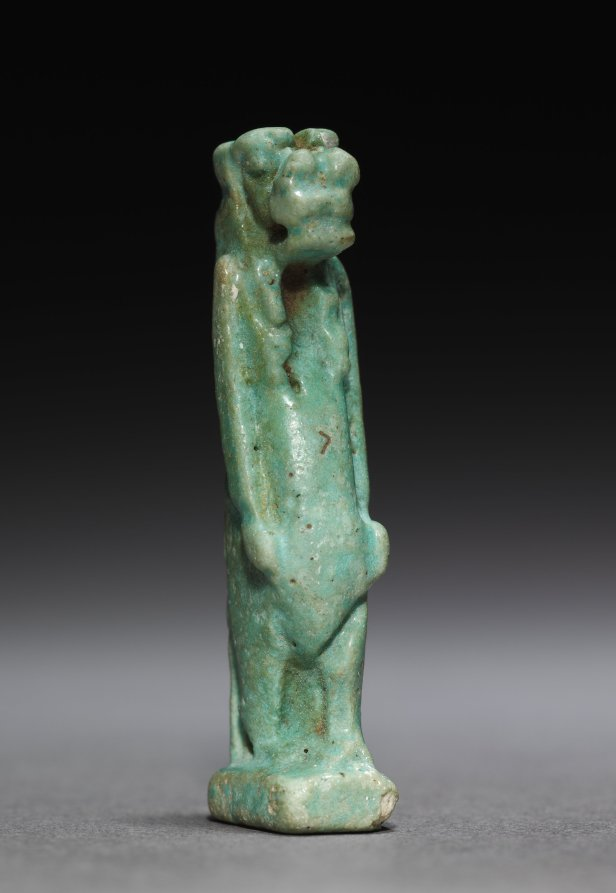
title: Amulet of Taweret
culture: Egypt, Greco-Roman period (332 BCE–395 CE), Ptolemaic dynasty (305–30 BCE)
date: 305–30 BCE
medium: light robin's egg blue faience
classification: Amulets